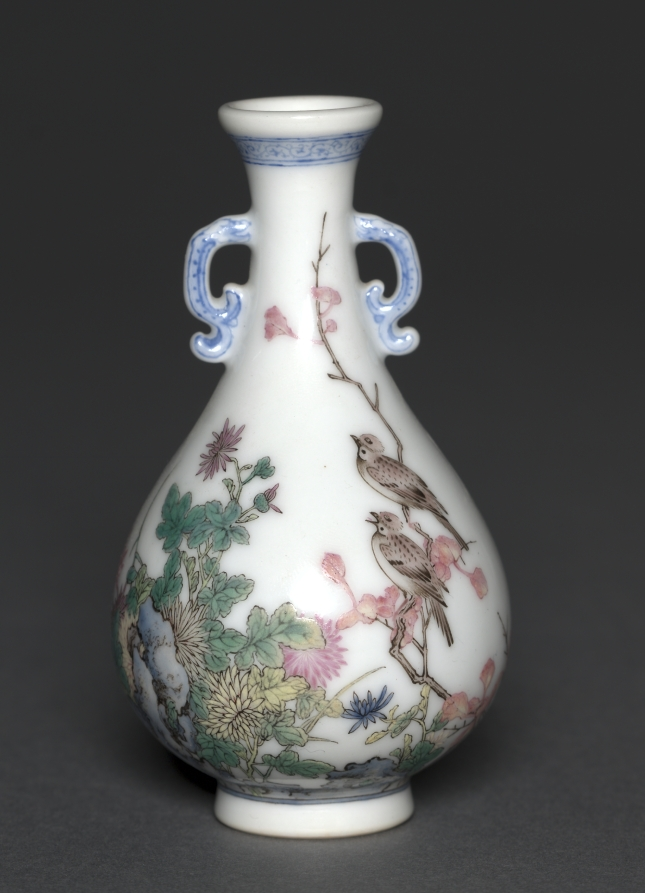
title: Miniature Vase with Birds and Chrysanthemums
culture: China, Jiangxi province, Jingdezhen kilns, Qing dynasty (1644-1911), Qianlong mark and reign (1736-95)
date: 1736–95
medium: porcelain with famille rose overglaze enamel decoration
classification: Ceramic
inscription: 乾隆年製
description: In the Qing dynasty (1644–1911), imperial patronage and a growing urban population encouraged consumption of luxury goods and local craftmanship. Luxury items became more affordable to larger parts of the society, including women, merchants, and literati in non-official positions. This miniature porcelain vase with famille rose overglaze enamel decoration illustrates some of the highest technical accomplishments in Qing porcelain production.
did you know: Famille rose overglaze enamel decoration is accompanied by underglaze blue on the vase's collar and handles.